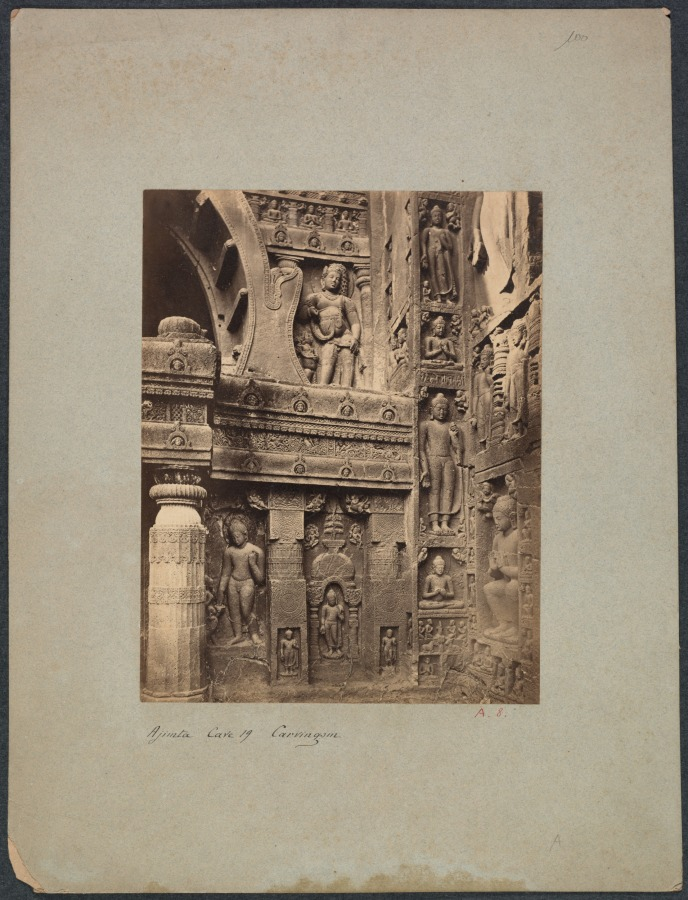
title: Ajinta Cave No. 19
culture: England, 19th century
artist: Francis Frith & Co. (British)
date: 1850s-1870s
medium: Albumen print from wet collodion negative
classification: Photograph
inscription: Albumen print from wet collodion negative Printed in red on recto of mount: "A.8." Written in black on recto of mount: "Ajinta Cave 19 Carvings" Written in pencil on recto of mount: "A" Written in pencil on recto of mount: "1000" Written in pencil on verso of mount: "8166/6"